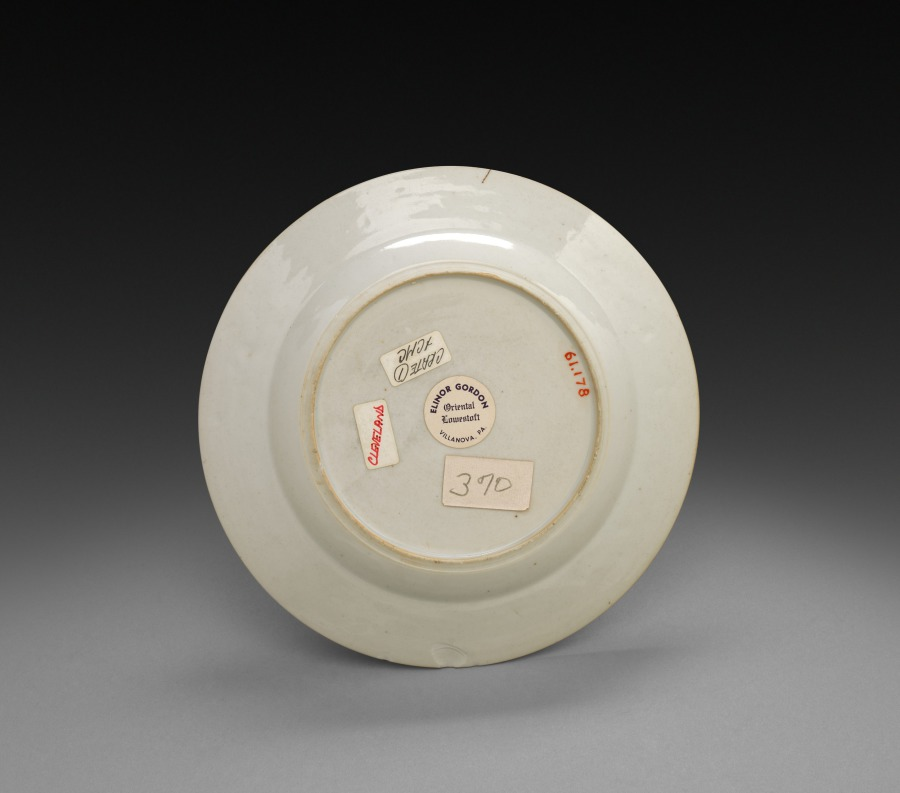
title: Plate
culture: China, Chinese Export, 18th century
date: c. 1790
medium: porcelain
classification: Ceramic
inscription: on front in center: initials S.S. above the badge of the Order of the Cincinnati.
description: From a service made for Samuel Shaw.